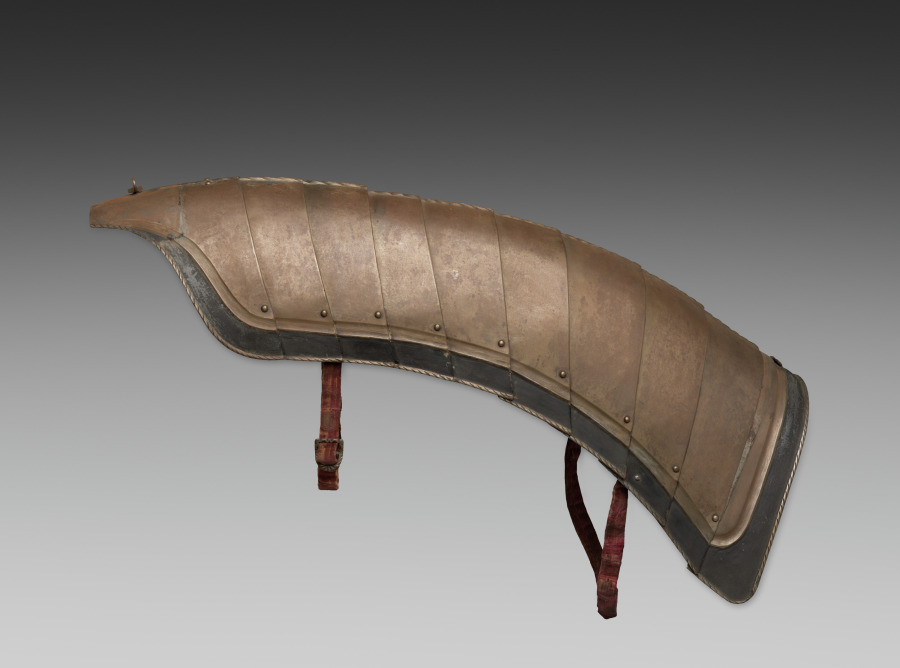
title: Horse's Crinet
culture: Germany, 19th century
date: 1801–1900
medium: steel with black paint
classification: Arms and Armor